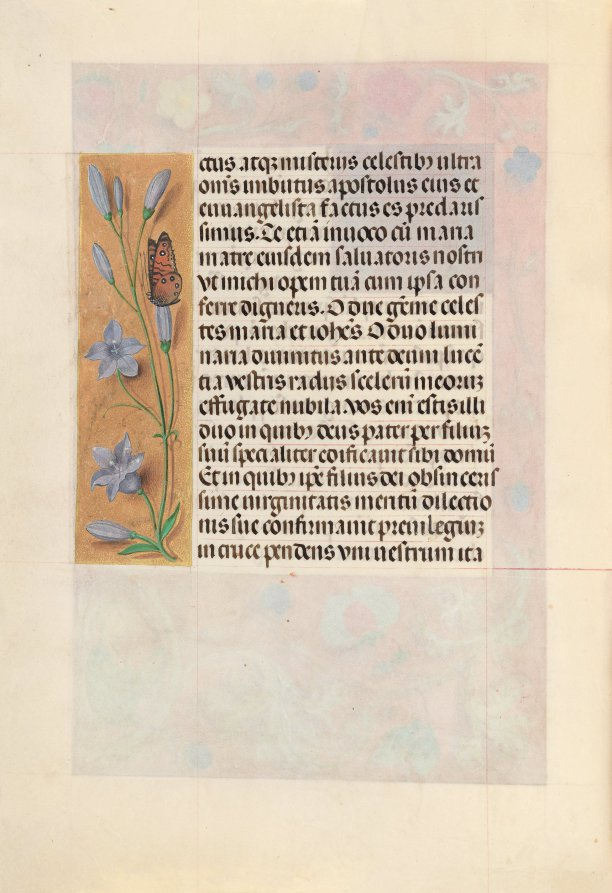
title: Hours of Queen Isabella the Catholic, Queen of Spain: Fol. 262v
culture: Flanders, Ghent and Bruges, late 15th century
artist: Master of the First Prayerbook of Maximillian (Flemish, c. 1444–1519)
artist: and Associates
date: c. 1500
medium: ink, tempera, and gold on vellum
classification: Bound Volume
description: This manuscript was illuminated by a circle of at least five highly organized manuscript painters active in the Flemish cities of Ghent and Bruges. The principal illuminator was Alexander Bening, who painted the majority of the book's miniatures. Manuscripts produced by this circle of artists are renowned for the decoration of their borders, which typically feature a rich variety of realistically-painted flowers, birds, and butterflies. This prayer book, called a book of hours, was intended not for a cleric, but for the private devotions of a lay person-in this case, Isabella the Catholic, Queen of Spain (1451-1504). Isabella's coat of arms embellishes the book's frontispiece. It is unlikely that the book was commissioned by the Queen herself; rather, she probably received it as a diplomatic gift from someone courting her patronage, perhaps Cardinal Francisco Jimenez de Cisneros. A Franciscan friar, Jimenez was dependent upon Isabella for his advancement, first to the post of Queen's confessor in 1492, and then to Archbishop of Toledo in 1495.